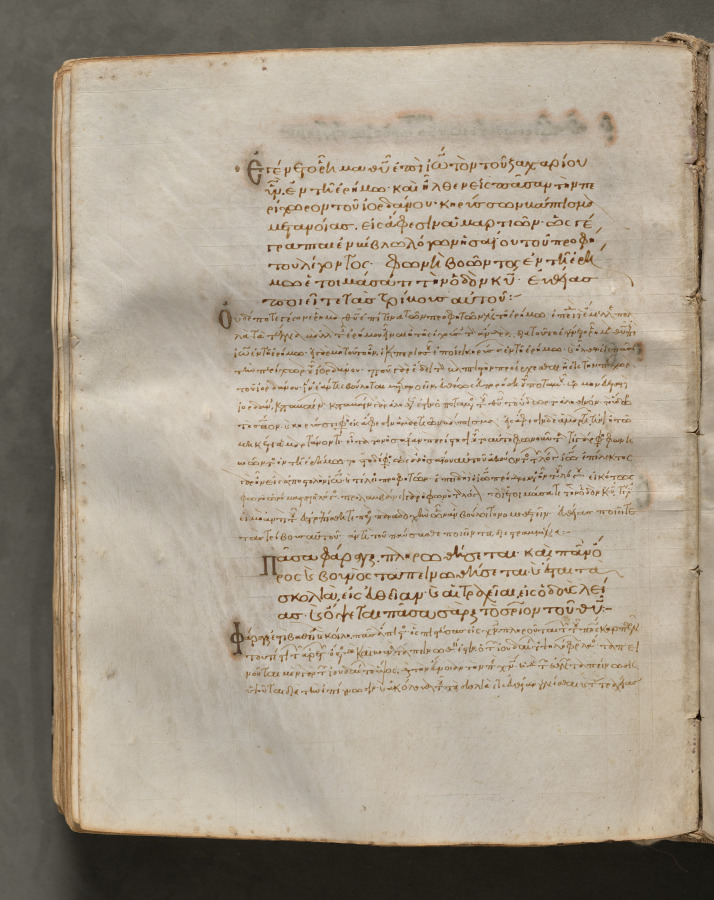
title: Text, folio 213 (verso), from a Gospel Book with Commentaries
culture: Byzantium, Constantinople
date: c. 1000–1100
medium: ink, tempera, and gold on vellum; leather binding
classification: Bound Volume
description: Each of the four gospels in this book opens on a page with brilliantly illuminated borders depicting the author of the text as well as birds-principally peacocks, symbols of the immortality of the soul-and fountains, representing the fountain of life and the salvation of the soul. This volume consists of 428 leaves with texts in Greek. Its level of sophistication suggests that it was probably written and decorated in a monastery in Constantinople.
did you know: Gospel Books were carried in procession through Byzantine churches.